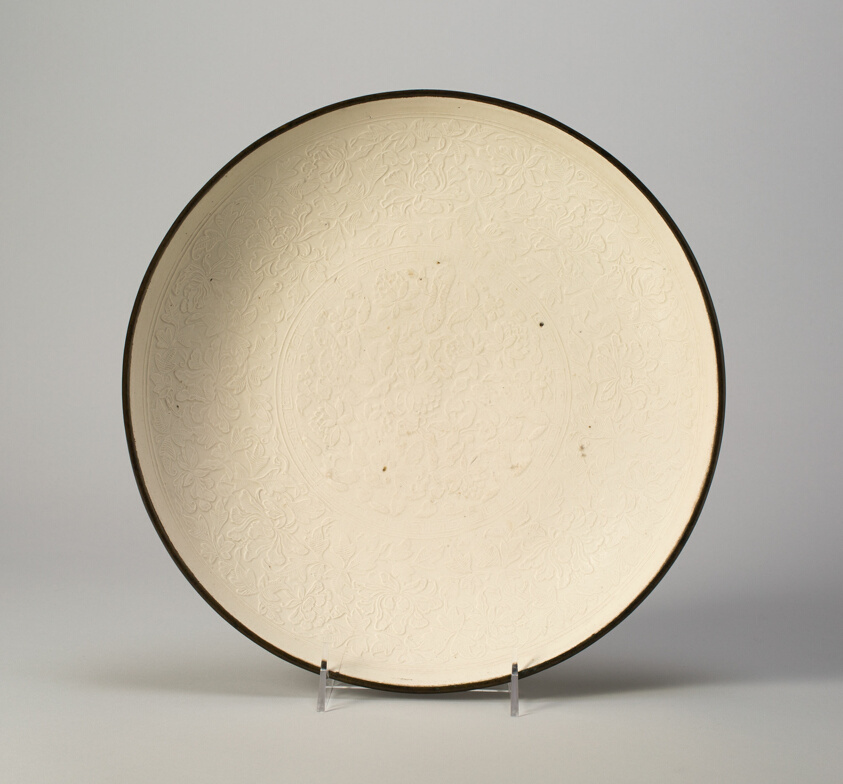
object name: Vessel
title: Dish with Lotus and Peonies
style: Chinese (culture or style)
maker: China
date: Song dynasty (960–1279)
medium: Ding ware; porcelain with underglaze molded decoration; copper rim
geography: China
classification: dish (vessel); porcelain; asian art; ceramics; vessel